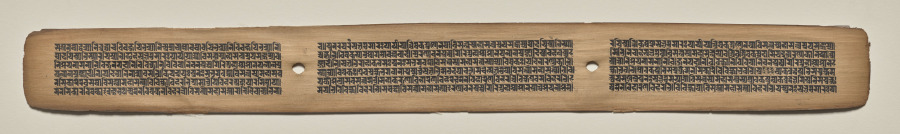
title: Text, Folio 138 (recto), from a Manuscript of the Perfection of Wisdom in Eight Thousand Lines (Ashtasahasrika Prajnaparamita-sutra)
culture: Eastern India, Bihar, Vikramashila Monastery. Painting: Nepal, Kathmandu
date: Sunday, September 14, 1119 (year 239 of the Newar Samvat in the month of Ashvina)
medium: gum tempera and ink on palm leaves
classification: Painting